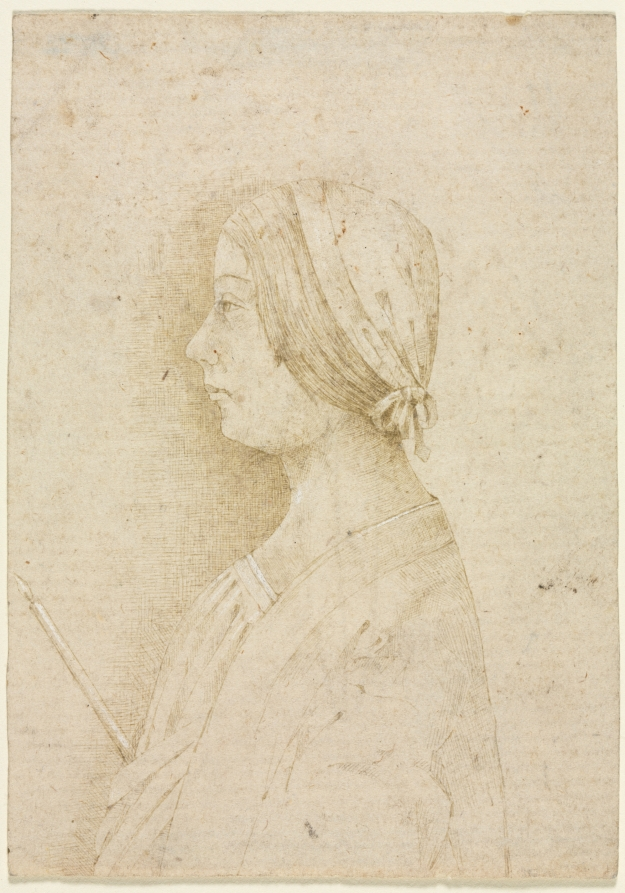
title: Profile of a Girl Holding a Candle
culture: Italy, Lombardy, 15th century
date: c. 1480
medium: pen and brown ink, heightened with traces of white gouache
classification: Drawing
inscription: VERSO, upper left, in graphite: W [underlined twice] ; upper center, in graphite: #52 ; upper right, in blue pencil: 25°°